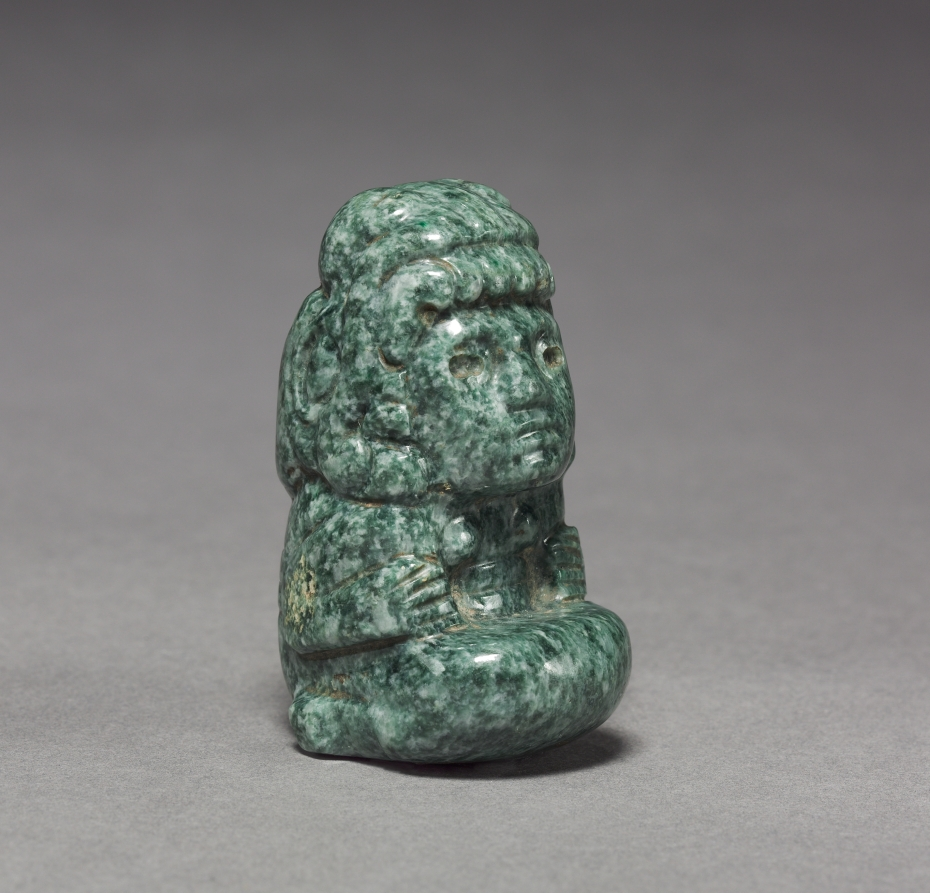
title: Female Figurine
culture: Central Mexico, Aztec, Post-Classic Period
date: 1325–1519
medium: jadeite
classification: Stone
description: Seated in typical female posture, this figurine probably represents an Aztec goddess or ritual impersonator. She wears a monster headdress, but her costume is simple, making specific identification difficult.